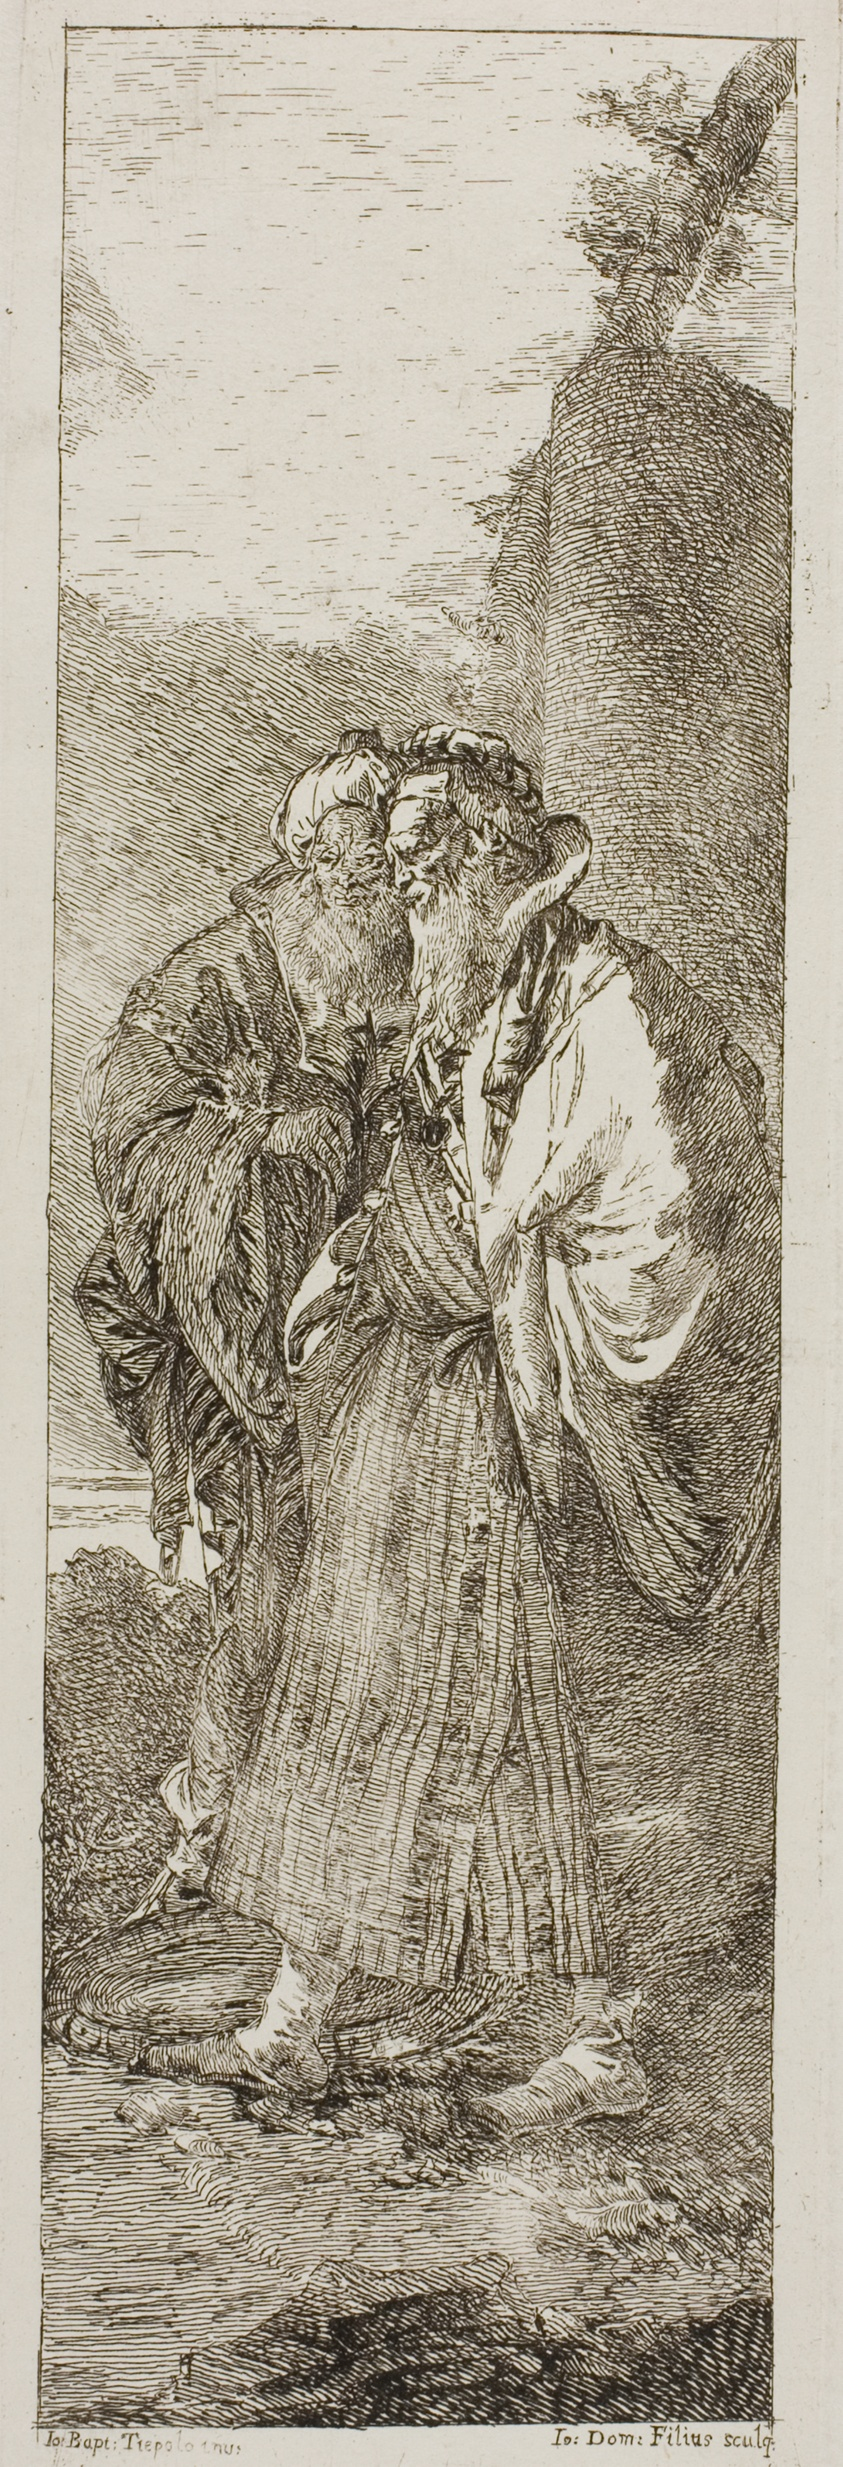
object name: Print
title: Two Old Men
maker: Giovanni Domenico Tiepolo (Italian, 1727-1804); after Giambattista Tiepolo (Italian, 1696-1770)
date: after 1755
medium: Two etchings on paper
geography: Italy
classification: etching; print; prints and drawing